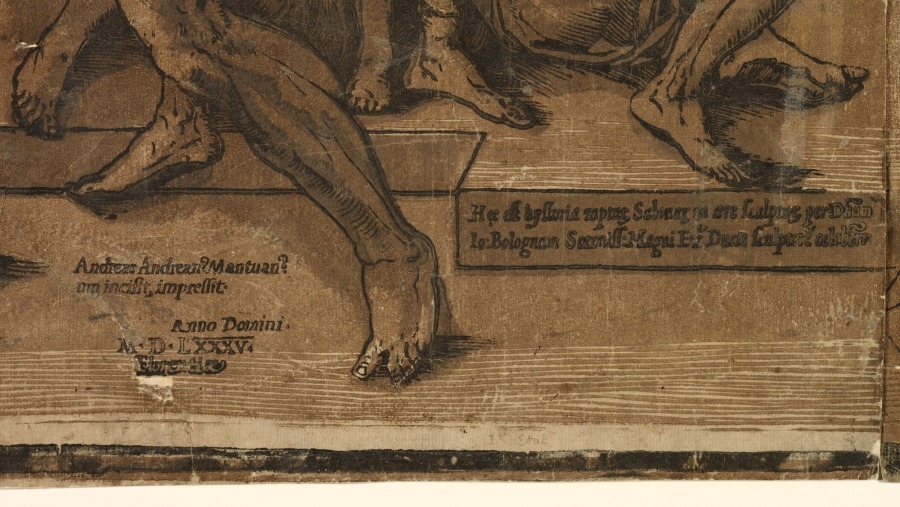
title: The Abduction of the Sabine Women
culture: Italy, 16th century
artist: Andrea Andreani (Italian, about 1558–1610)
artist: after Giambologna (Flemish, active Italy, 1529–1608)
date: 1585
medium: chiaroscuro woodcut (in three shades of brown and black)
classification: Print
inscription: Central sheet in darker tone block: Andreas Andrean' Mantuan' / eam incisit impressit °/ Anno Domini ° / M°D°LXXXV° / Florentiae; hec est hystoria rapta(um) Sabinar(um) in are sculptar(um) per Doum / Io: Bolognam Sereniss. Magni Etre Ducis sculptore celeberr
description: The legend of the Sabine women relates to Rome’s early history when, to ensure the future population of the city, its founder Romulus hosted a festival for neighboring peoples, including the Sabines. At an appointed moment during the festivities, each young man of Rome kidnapped an unmarried Sabine woman to be his bride. Later, when the Sabines attacked Rome, it was the abducted Sabine women who courageously stopped the brutal battle and demanded peace between their fathers, brothers, and husbands. Andreani’s chiaroscuro woodcut, with its brown-red tone, subtle shadows, and warm highlights, was a fitting choice for reproducing Giambologna’s original bronze relief, created for the pedestal of his sculpture The Abduction of a Sabine Woman.